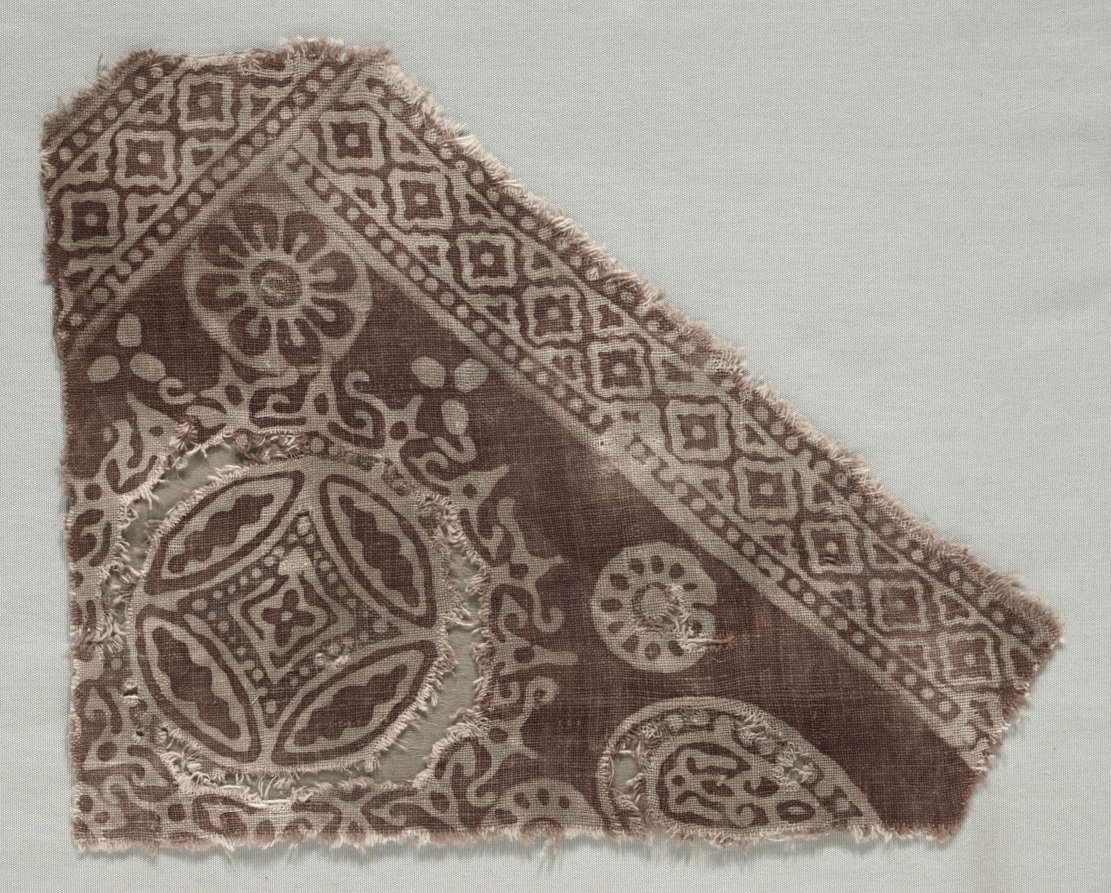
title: Fragment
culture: India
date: 1300s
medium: drawn resist, painted mordant, dyed; cotton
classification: Textile